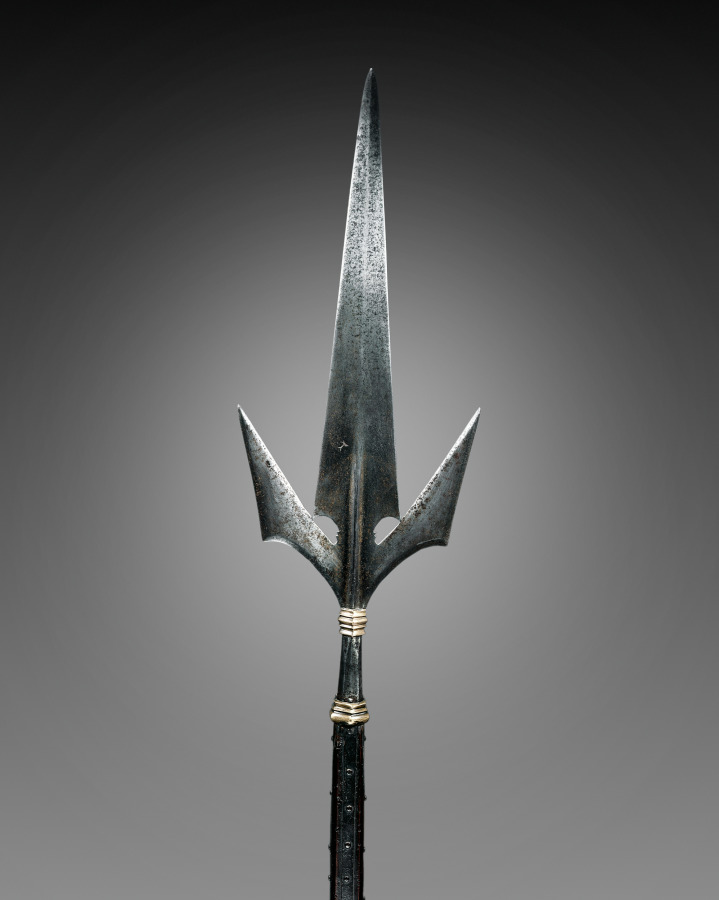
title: Corsèque (Chauve-Souris)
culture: North Italy, 16th century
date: c. 1530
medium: steel, square wood haft with planed corners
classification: Arms and Armor